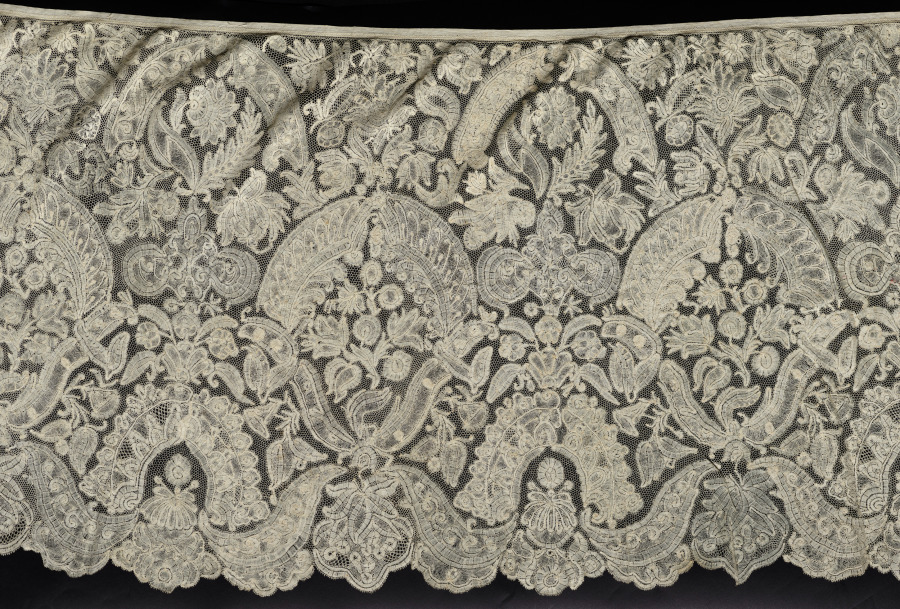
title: Lace Flounce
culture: Flanders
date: 1700s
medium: Bobbin lace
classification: Lace